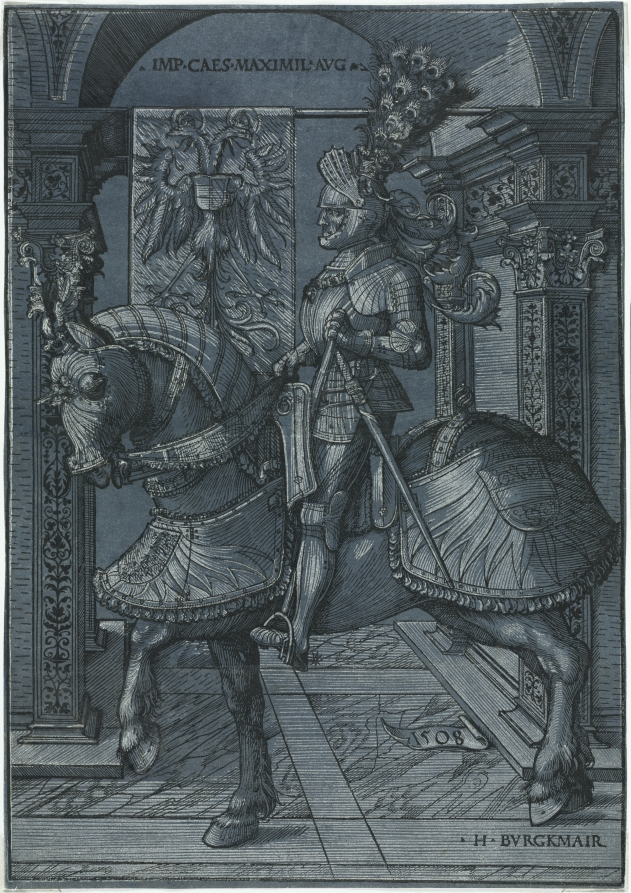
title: Equestrian Portrait of the Emperor Maximilian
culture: Germany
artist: Hans Burgkmair (German, 1473–1531)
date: 1508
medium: woodcut, in black and white on paper washed blue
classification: Print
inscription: upper center, in block: . IMP·CAES·MAXIMIL·AUG· ; lower right, in block: 1508 ; lower right, in block: ·H·BURGKMAIR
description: Presented in full profile, the Holy Roman Emperor Maximilian I (reigned 1486–1519) and his mount emulate a classical equestrian portrait statue. The Latin abbreviations inscribed at the top of the page describe him as “August Emperor Caesar Maximilian,” a title conceptually equating him with the leaders of the ancient Roman Empire. The two-headed eagle on the banner is the emblem of his dynastic family, the Hapsburgs. This exceptionally rare chiaroscuro woodcut— printed with black and white inks on paper prepared with tinted wash—represents one of the earliest experiments with this technique. Of the two surviving impressions printed on hand-colored paper, this is the only one that is blue.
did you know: Known as "the last knight," Maximilian was an enthusiast of tournaments and hunting; here he wears the type of fluted armor that later would be named for him.